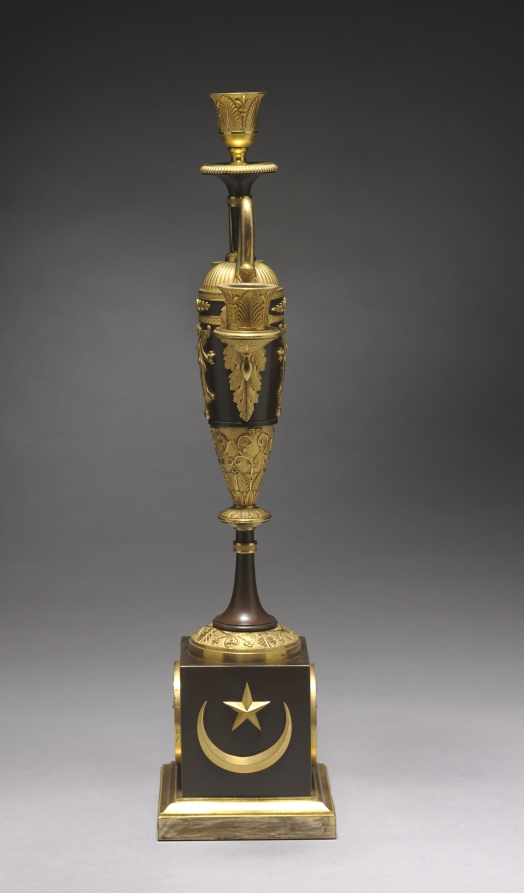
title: Candelabrum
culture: France, late 18th-early 19th century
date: c. 1800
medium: gilt and patinated metal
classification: Furniture and woodwork